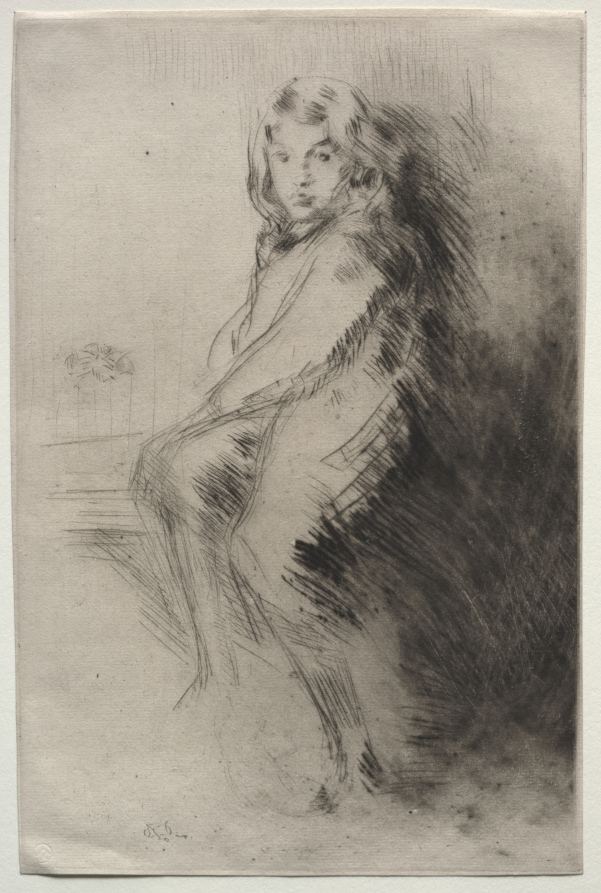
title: The Boy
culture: America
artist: James McNeill Whistler (American, 1834–1903)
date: 1875–76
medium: drypoint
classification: Print